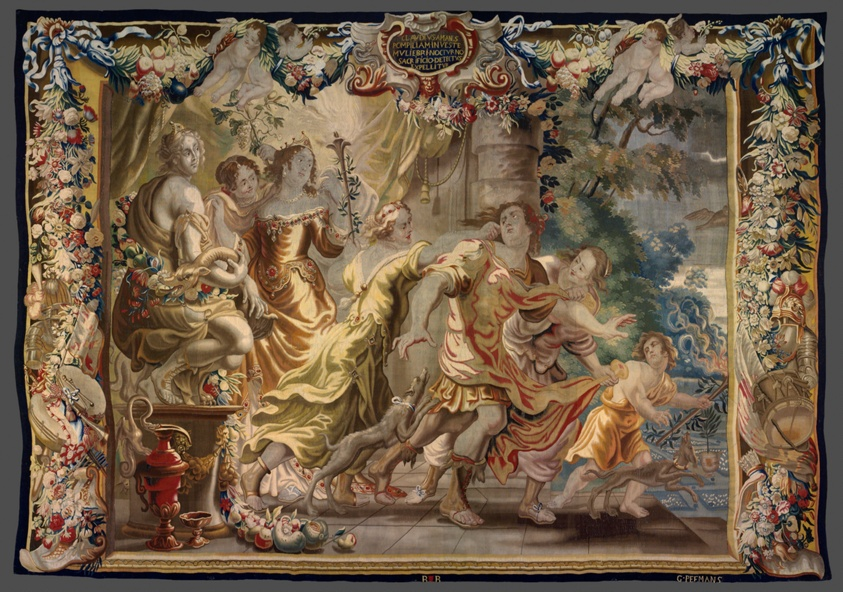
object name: Textile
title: Clodius Disguised as a Woman from The Story of Caesar and Cleopatra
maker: After a design by Justus van Egmont (1601–1674); Woven at the workshop of Gerard Peemans (1637/39–1725); Flanders, Brussels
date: c. 1680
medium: Wool and silk, slit and double interlocking tapestry weave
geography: Flanders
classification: weaving - tapestry; textile